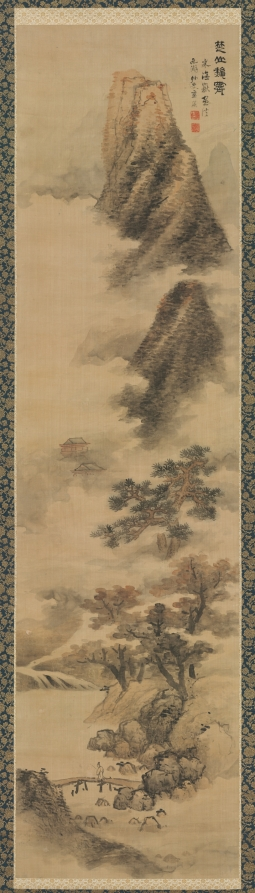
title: Clearing Autumn Mists in the Chu Mountains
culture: China, Ming dynasty (1368–1644)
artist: Lan Ying (Chinese, 1585–after 1664)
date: 1600s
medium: hanging scroll, ink and light color on silk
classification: Painting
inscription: Artist's inscription, signature, and 2 seals: Clearing Autumn Mists in the Chu Mountains, painted in the manner of Mi Haiyue [Mi Fu]. Xihu waishi, Lan Ying [seals] Lan Ying zhiyin; Shiwu toutuo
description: In his inscription Lan Yin states that he uses Mi Fu’s methods to depict this landscape. The ovoid "Mi" dots—Mi Fu’s brush idioms—are applied to give shape to the cloud-enveloped mountains and foreground tree grove for self expression. Engaging in the process of fang (imitation), he acquired the methods of various schools and masters to expand his technical range for creative transformations. Lan Yin developed his unique style and inspired major artists like Liu Du and Chen Hongshou.